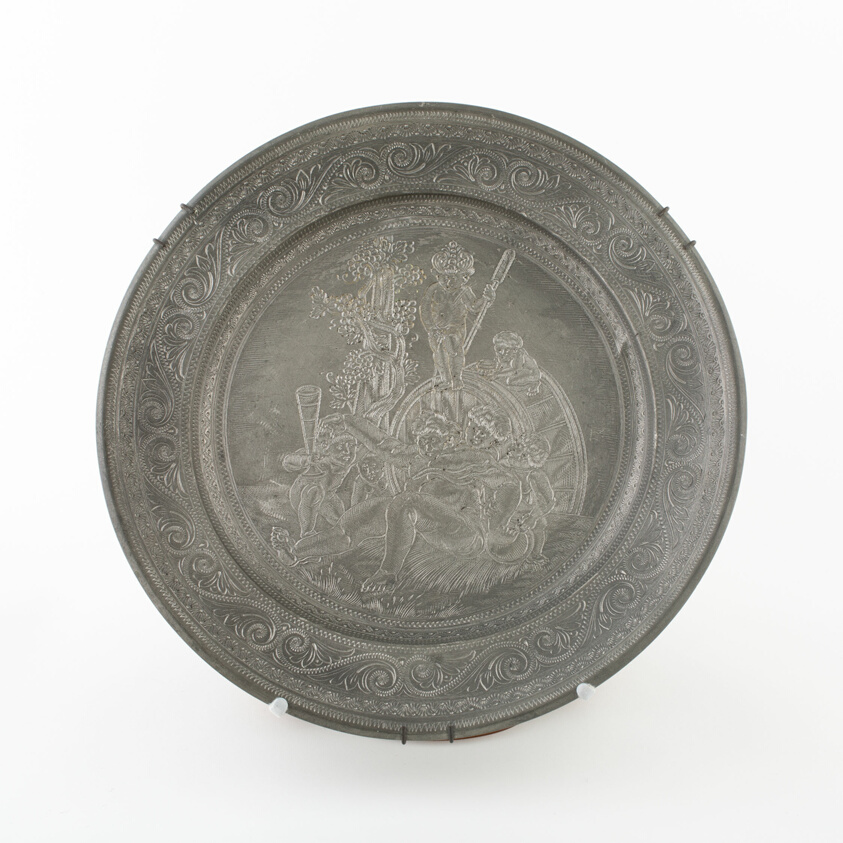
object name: Metalwork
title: Plate with Silenus and Putti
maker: Engraving after Hans Baldung; German, 1484-1545; Germany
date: 18th century; engraving probably 19th century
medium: Pewter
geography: Germany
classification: plate (general, dish); pewter; dish (vessel); metalwork; european decorative arts